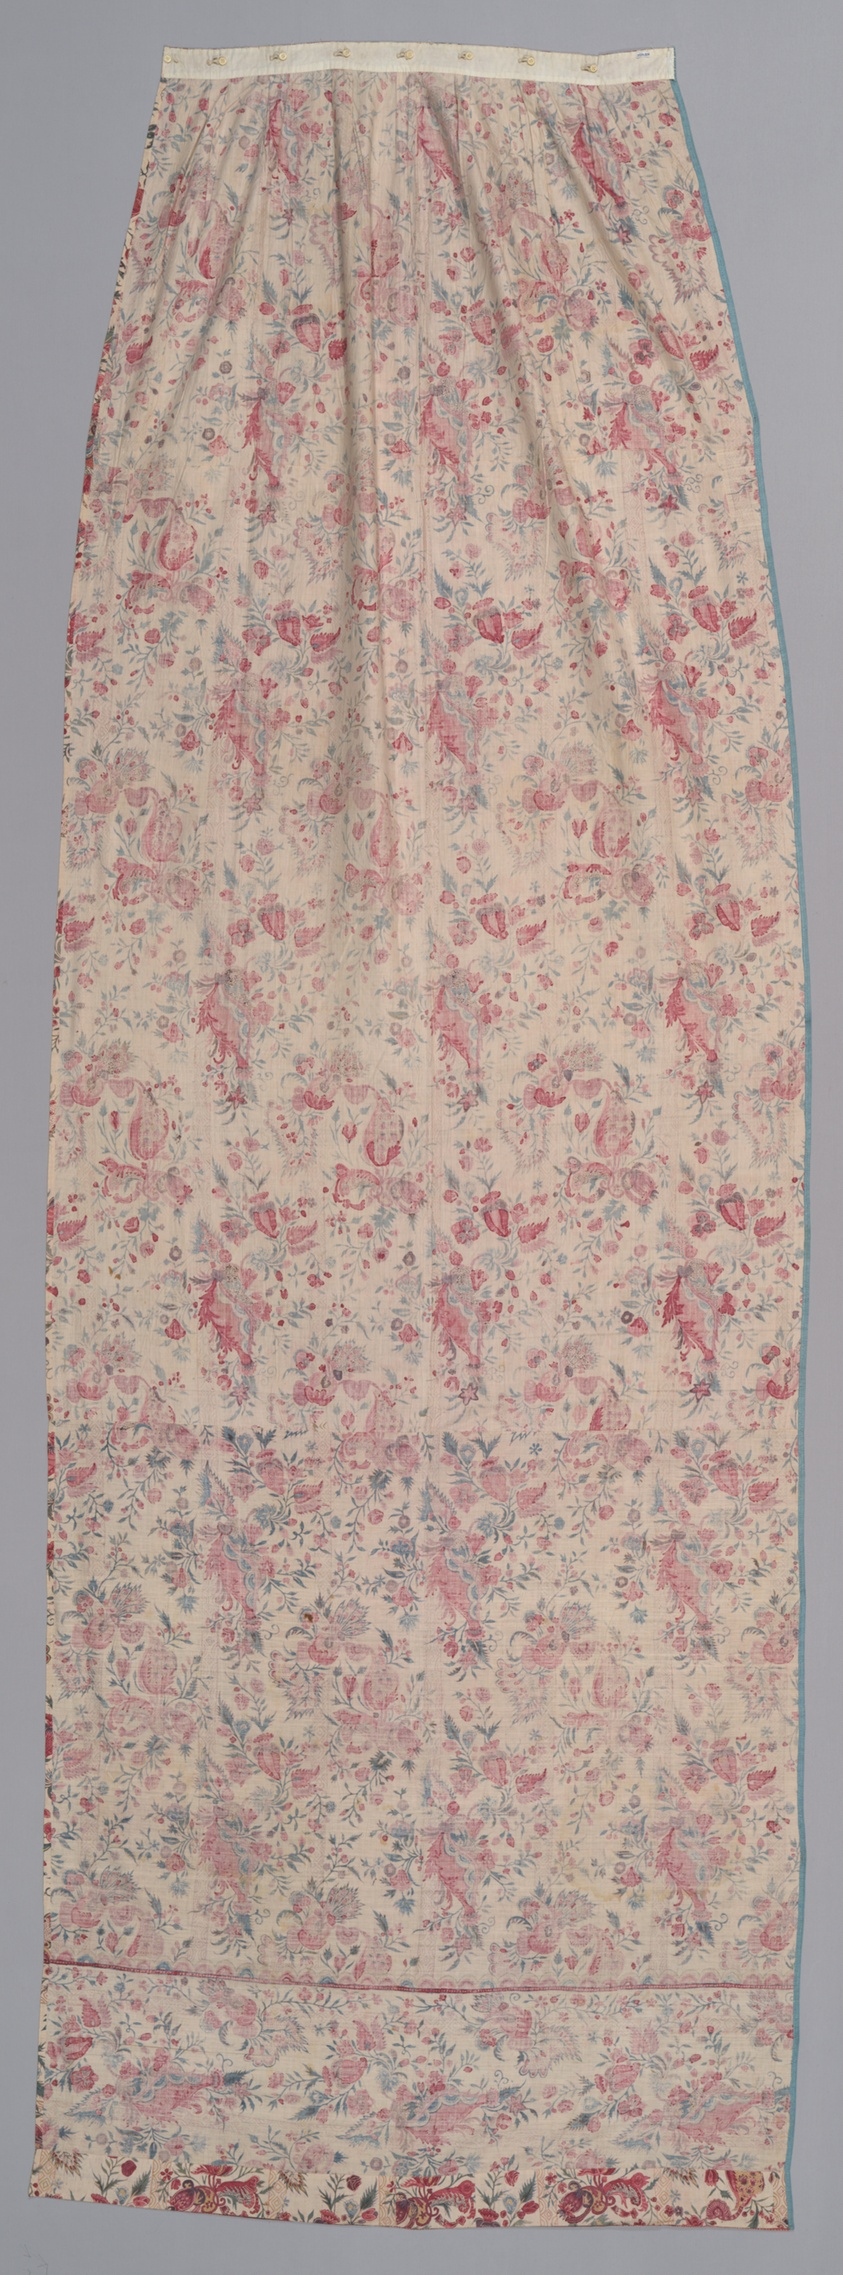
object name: Coverings and Hangings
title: Chintz Curtain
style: 18th Century, chintz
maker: Indian export for European market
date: First quarter 18th century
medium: Cotton, plain weave; painted and resist-dyed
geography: India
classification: weaving; textile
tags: botanical/floral, abstract objects, diamond shapes, floral motifs, flowers